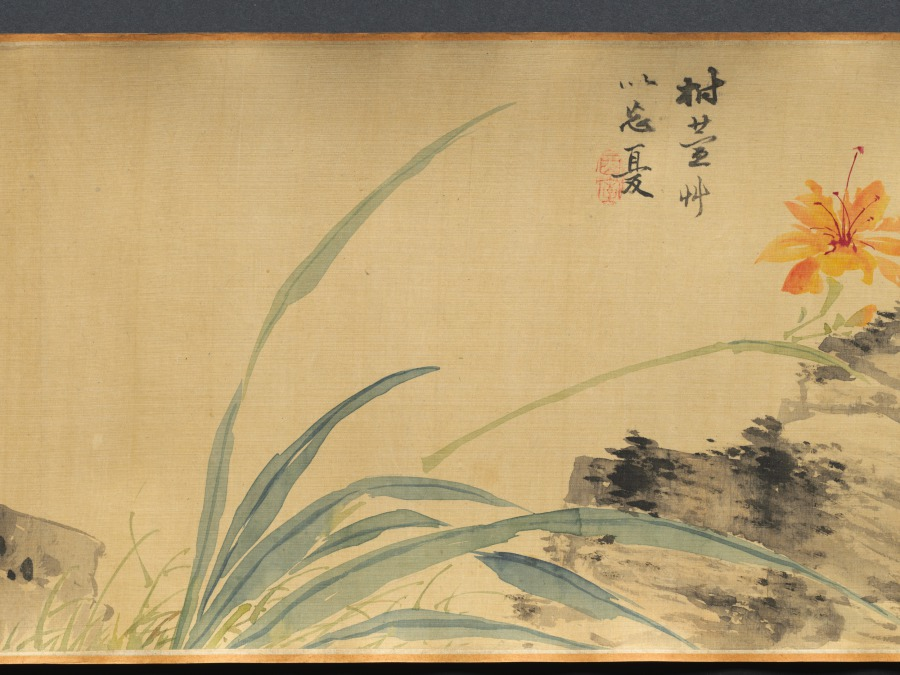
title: Flowers of Four Seasons, with Poems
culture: China, Ming dynasty (1368–1644)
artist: Wang Guxiang (Chinese, 1501–1568)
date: 1531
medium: handscroll; ink and light color on silk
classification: Painting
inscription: Artist's inscription, signature, and 15 seals. Ink Orchids. Sewn as pendants for the man of worth, swaying quiety, fragrance in the valley. [seal] Hsiao-chu ts'un Peony. Wiping his face, the young gentleman Ho [Ho Yen of Wei, Three Kingdoms] appears to have been powdered. His previous life was the perfume-stealing Han Shou [of Chin, 265–419 CE], the fragrance still lingers. [seal] Ts'un-wu chai. Flowering Crab Apple, New Bamboo. Shao-lin [Du Fu, 712–770] had to put down his brush. [Flowering Crab Apple]. Yü-k'o [Wen T'ung, d. 1079) in vain wrote poems about [Bamboo]. [seal] Yu-shih. Lotus Flowers. When she turns her head, half-hidden by a fan, and casts a glance, all the beautiful women become colorless. [seal] K'ang yüeh huai. Loquat. Ripeness in summer. [seal] Lu-chih. Pomegranate Flower. Whenever I remember you I will send my thoughts, but where have you gone--the [skirt] of pomegranate red? [seal] Wu-ho Sheng. Day Lily. Plant the day lily to forget sorrow. [seal] Yu-shih. Chrysanthemum. The untrammelled joy at the eastern fence. [seal] Lu-chih. Begonia. Comparing it to the beauties of Spring, and spreading them out as trimming for the stone steps. [seal] Yu-shih. Hibiscus. In recent years I have always enjoyed looking at flowers; instead of dark red I preferred pink ones. [seal] Jen-sheng i-lou. Narcissus, Camellia. The jade girdle left behind at Lo River. [Narcissus]. The precious pearls glitter before Spring. [Camellia]. [seal] Lu-chih. Heavenly Bamboo (Nandina domestica). A single branch in the wintry season. [seal] K'ang yüeh huai. Plum. Fragrant snow in the Lo-fou Mountains. [seal] Ts'un-wu chai. In the eleventh lunar month of the hsin-mao year of the Jiaqing era [1531], [I] imitated the boneless style of Yüan masters in sketching from life. Guxiang [seals] Yu-shih; Lu-chih. Translated by Wai-kam Ho/Lingyun Shih Liu (1980)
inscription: 2 colophons and 23 additional seals: 1 colophon dated 1632, and 2 seals of Li Jih-hua [Li Rihua] 李日華 (1565–1635); 1 colophon and 2 seals of Xiang Shengmo 項聖謨 (1597–1658); 3 seals of Liang Qingbiao 梁清標 (1620–1691); 6 seals of the Jiaqing 嘉慶 emperor (r. 1796–1820); 9 seals of Ch'eng Ch'i [Cheng Qi] 程琦 (1911–1988)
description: In this painting, flowers are loosely arranged by the seasons: narcissus and peony represent early spring; yellow loquat and lotus, summer; chrysanthemum, autumn; and the plum and evergreen bamboo, winter. The artist added to each flower a poetic line of calligraphy associating each plant with a historic or legendary figure. For example, the chrysanthemum, along with the line “The untrammeled joy at the eastern fence,” refers to the poet Tao Yuanming (died AD 427) who enjoyed chrysanthemums at the eastern fence in his garden. The scroll illustrates Wang Guxiang’s mastery of free brushwork, combining light monochrome ink with transparent colors. In his inscription, Wang says he used the “boneless” style without outlines as developed during the Yuan dynasty (1279–1368). Wang was a native of Changzhou, a city in southeast China known for its rich flora and fauna, and flower-and-bird painting tradition.